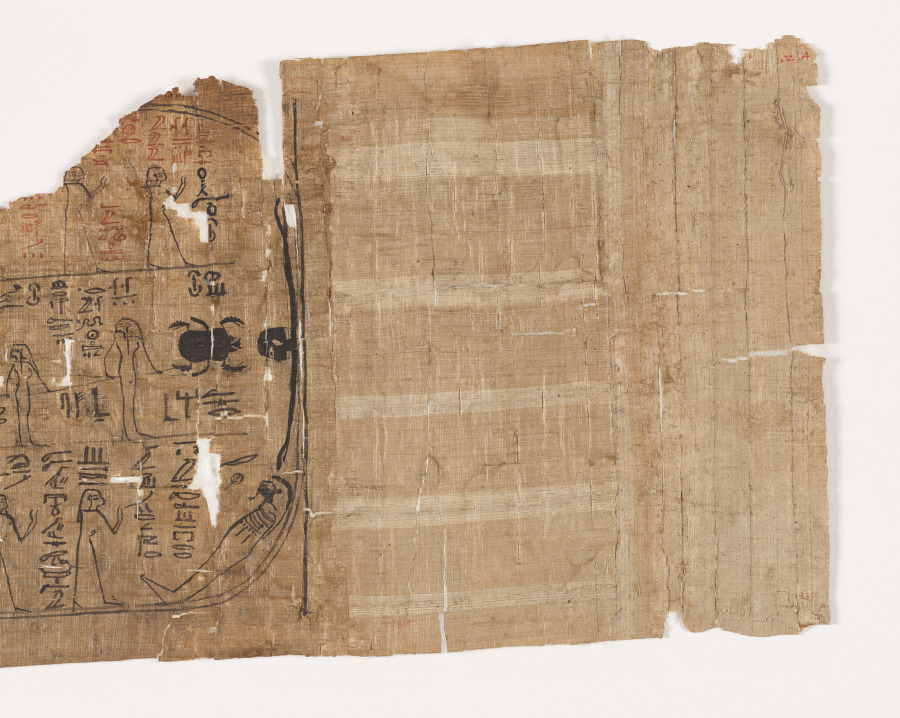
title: Book of Amduat, Perhaps of Bakenmut, with Elements of the Tenth through Twelfth Hours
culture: Egypt, Third Intermediate (1069–715 BCE), Dynasties 21–22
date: 1000–900 BCE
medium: papyrus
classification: Funerary Equipment